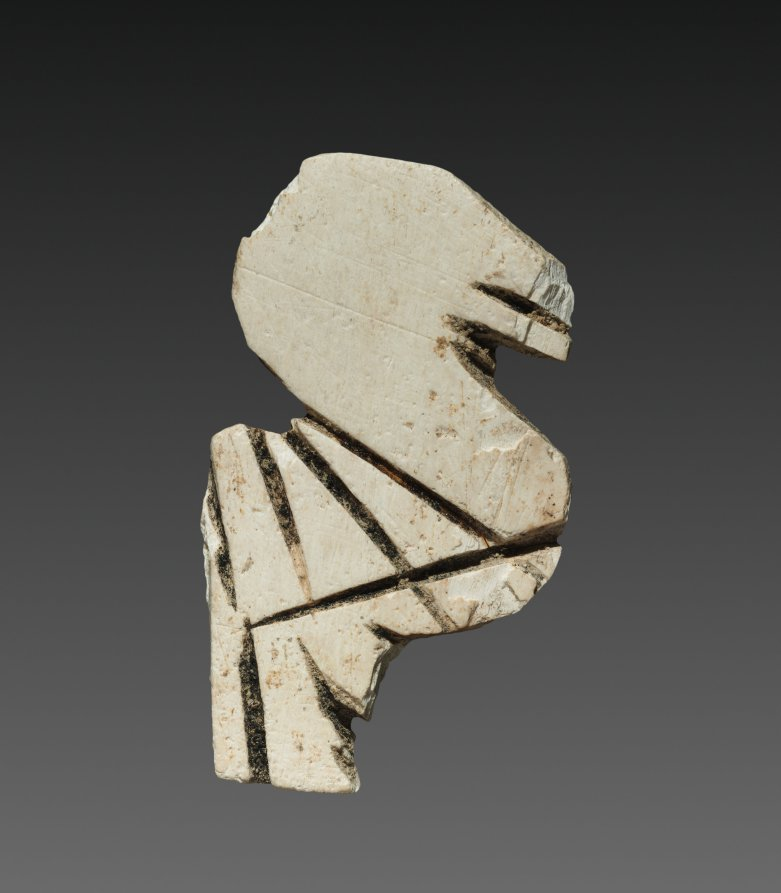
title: Stylized Bird: Decorative Inlay for a Box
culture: Israel, possibly Jericho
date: c. 2000 BCE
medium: bone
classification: Ivory